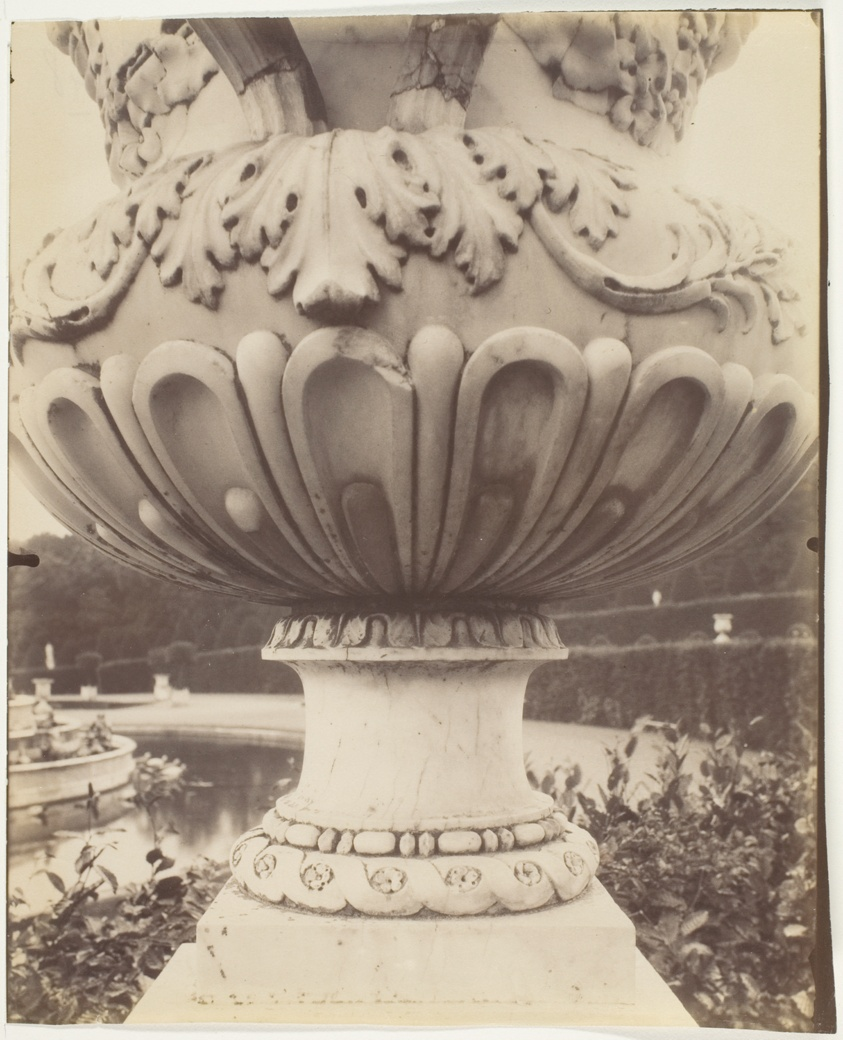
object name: Photograph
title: Versailles, Vase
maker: Jean-Eugène-Auguste Atget (French, 1857–1927)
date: 1906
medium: Albumen print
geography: France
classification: albumen silver print; photographic process; photography; photograph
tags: Collected by Hugh Edwards